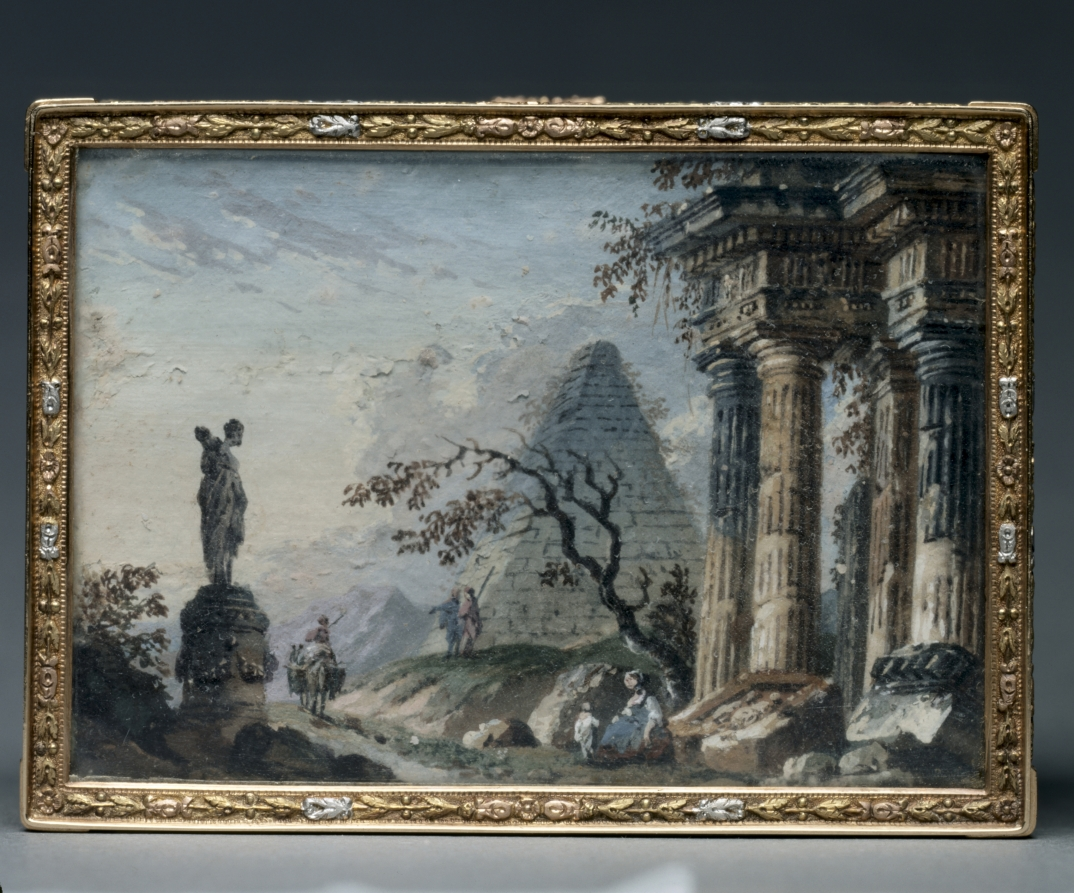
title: Rectangular Box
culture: France, 19th century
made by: Alexandre Leferre (French)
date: c. 1840–1850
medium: gouache miniatures mounted on gold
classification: Miscellaneous